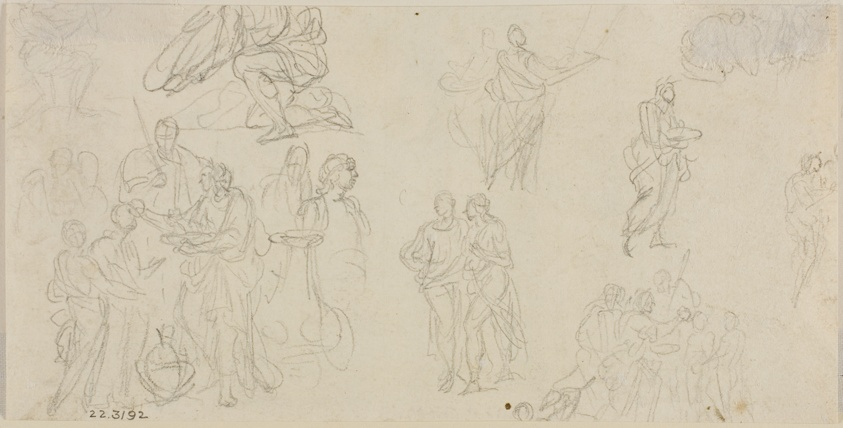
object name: Drawing and Watercolor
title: Lupercalia (recto), and Sketches of Figures (verso)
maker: James Thornhill (English, 1675-1734)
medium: Pen and brown ink, with brush and brown wash, over graphite (recto), and black chalk (verso), on ivory wove paper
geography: England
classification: pen and ink drawings; drawings (visual works); prints and drawing